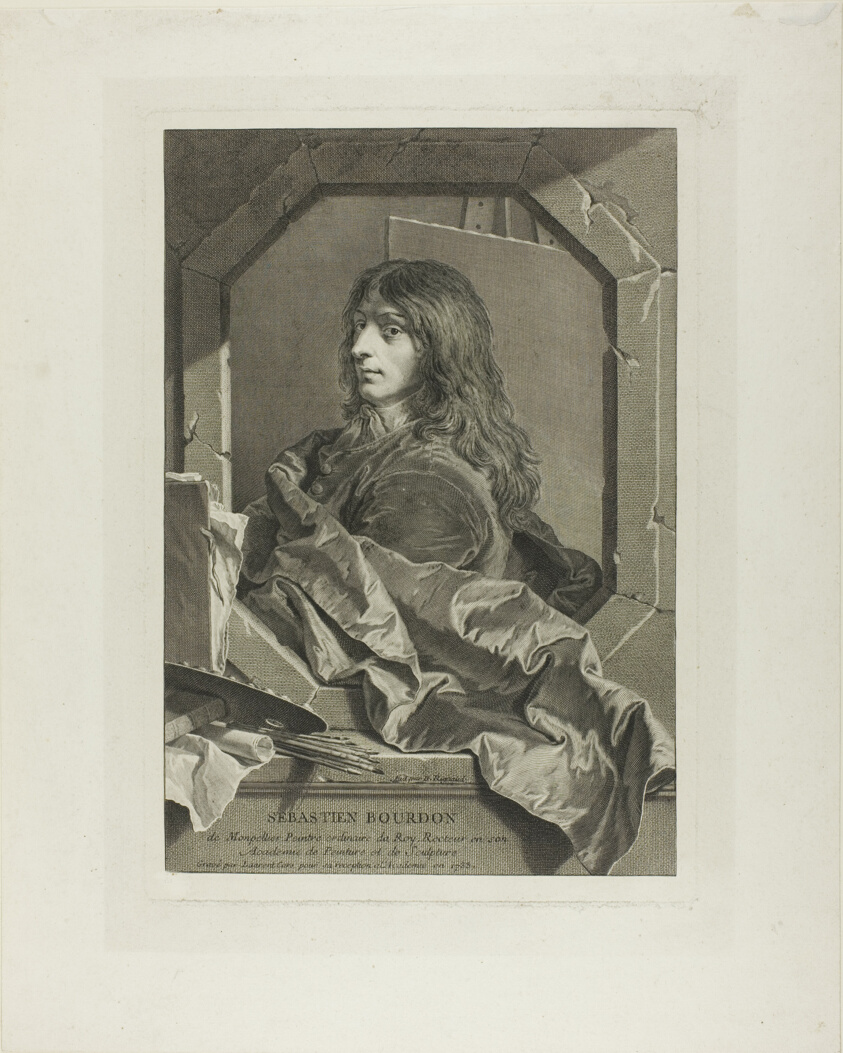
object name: Print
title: Sebastian Bourdon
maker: Laurent Cars (French, 1699-1771)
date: 1733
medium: Etching on paper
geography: France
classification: etching; print; prints and drawing